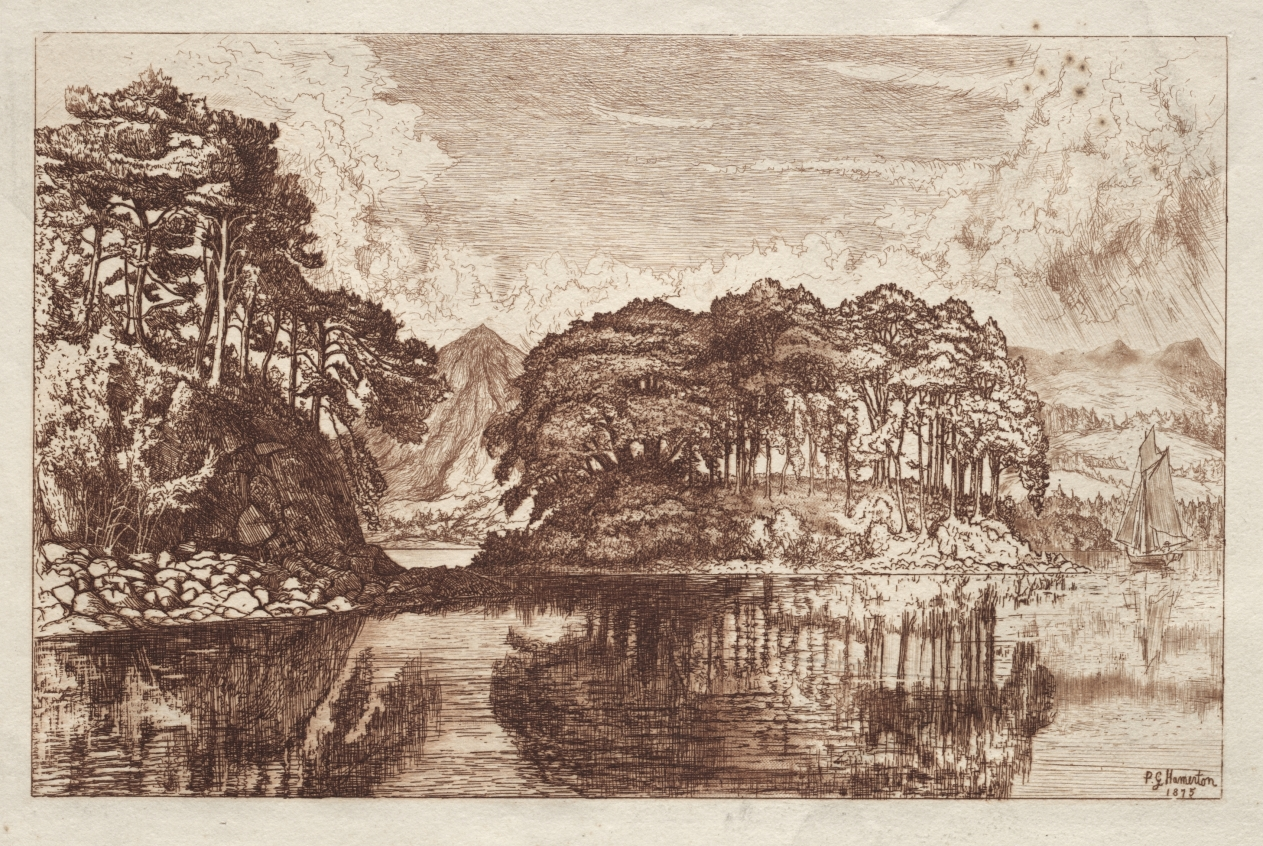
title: The Lake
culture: England, 19th century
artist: Philip Gilbert Hamerton (British, 1834–1894)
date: 1875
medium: etching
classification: Print